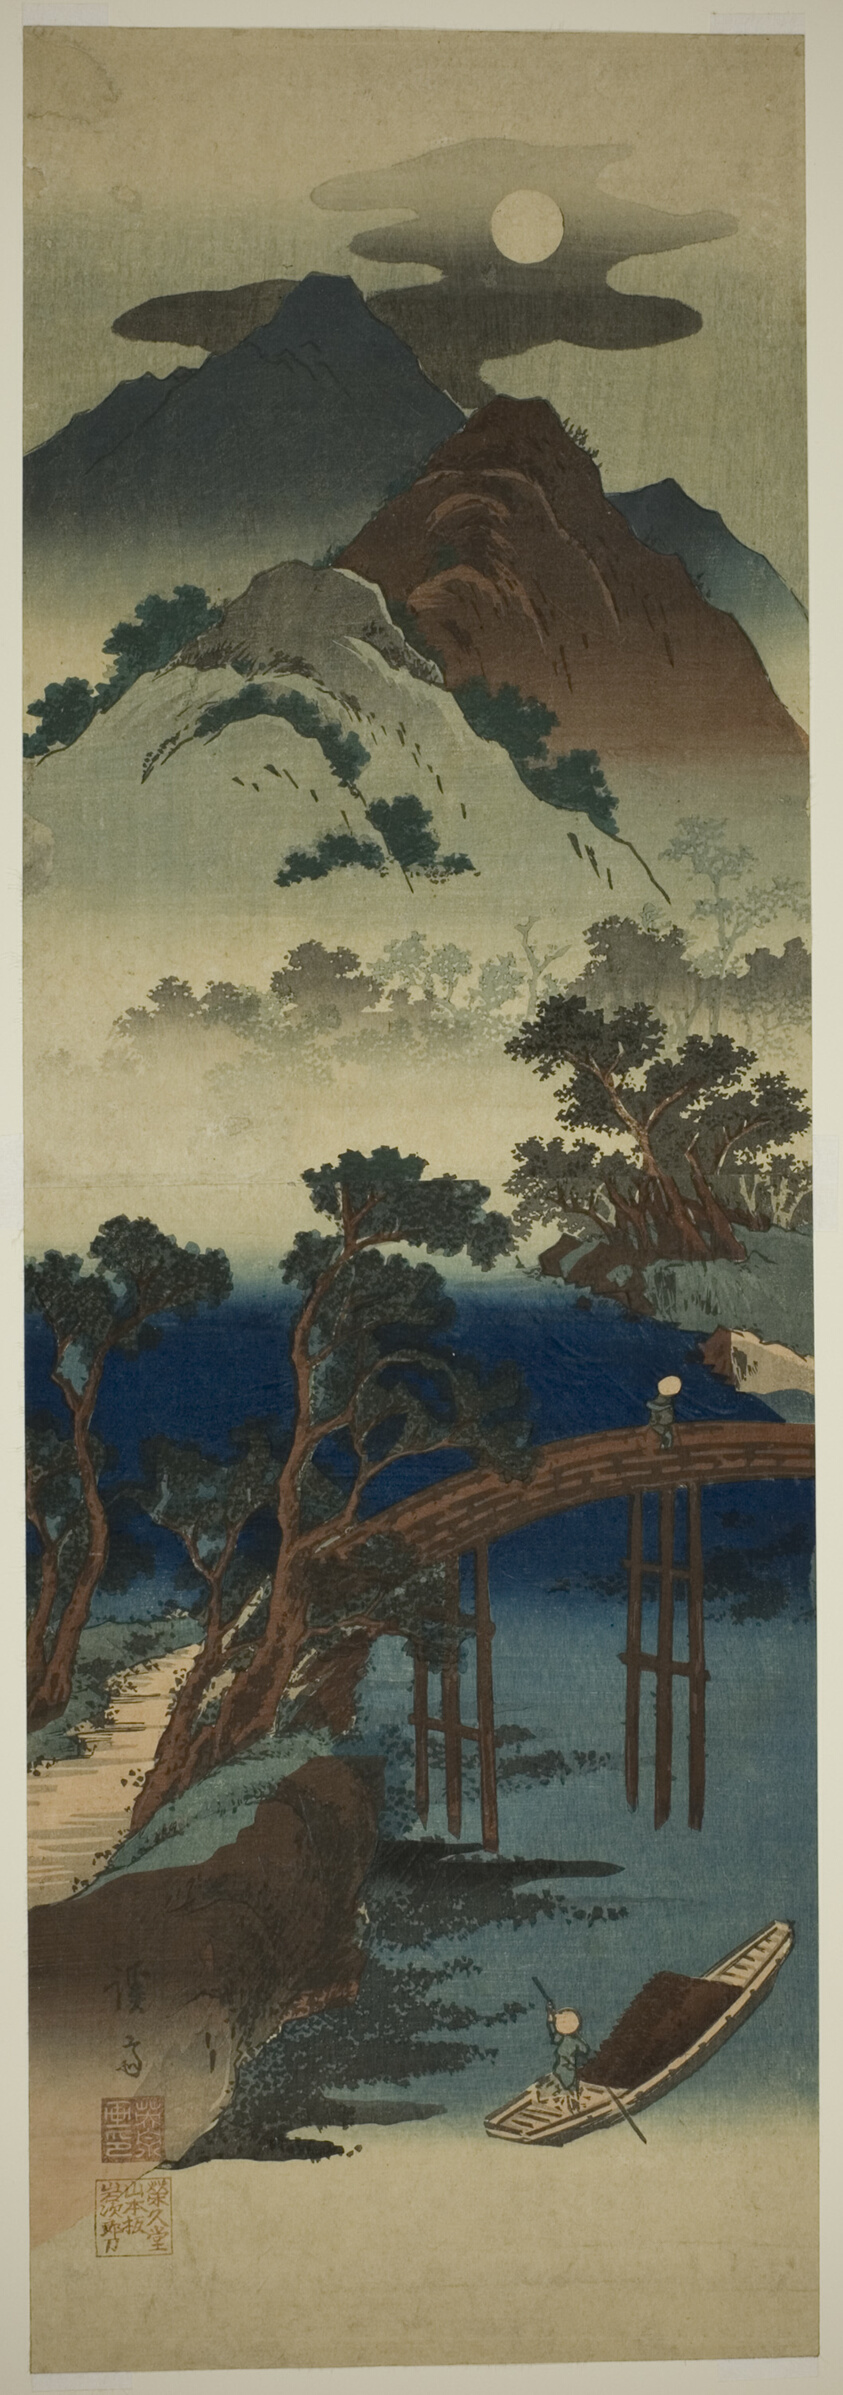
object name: Print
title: Full Moon Over Mountain Scenery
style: Japanese (culture or style)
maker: Keisai Eisen (Japanese, 1790-1848)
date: c. 1835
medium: Color woodblock print; vertical oban diptych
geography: Japan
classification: woodblock print; print; asian art